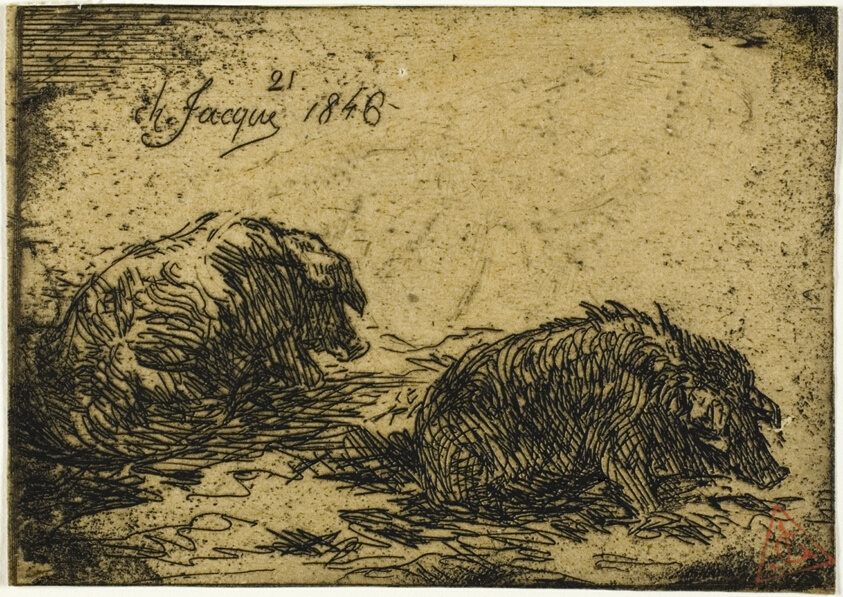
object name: Print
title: Two Pigs Lying Down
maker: Charles Émile Jacque (French, 1813-1894)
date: 1846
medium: Etching on buff chine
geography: France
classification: etching; print; prints and drawing